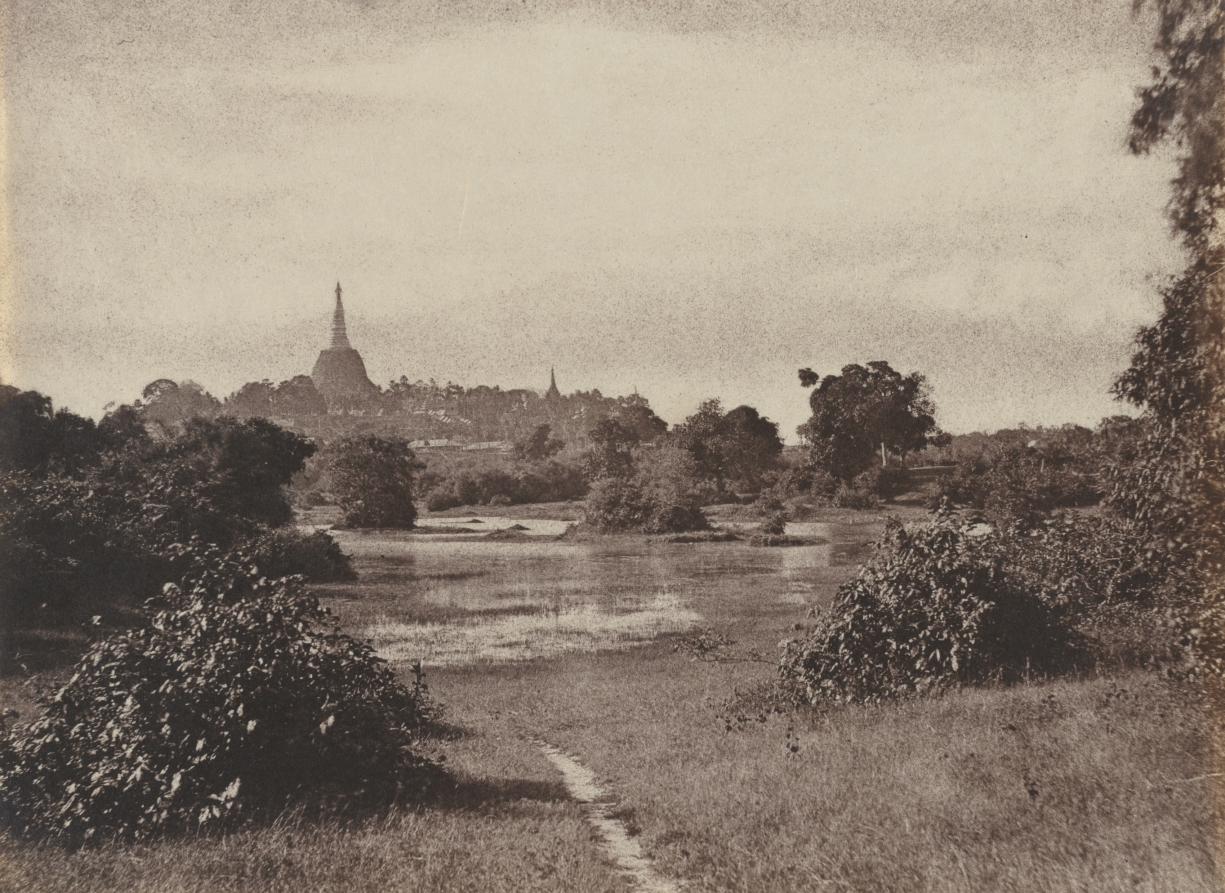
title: Rangoon. View Near the Lake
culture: England, 19th century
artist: Captain Linnaeus Tripe (British, 1822–1902)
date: 1855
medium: albumenized salt print from a paper negative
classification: Photograph